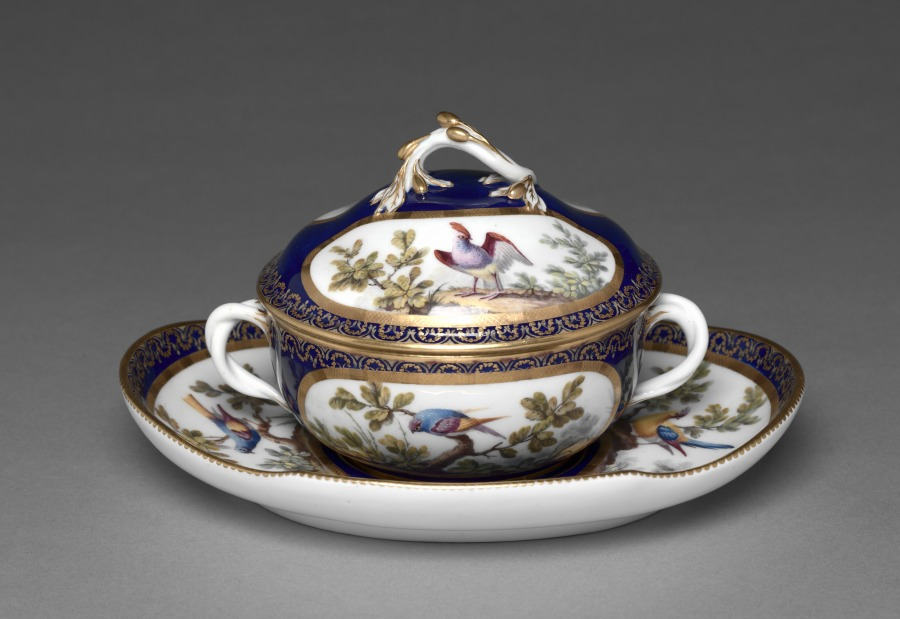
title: Covered Broth Bowl and Stand (Écuelle ronde et plateau ovale)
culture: France, Sèvres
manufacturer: Sèvres Porcelain Factory (French, est. 1756)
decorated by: François-Joseph Aloncle (French)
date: 1772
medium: soft-paste porcelain with enamel and gilt decoration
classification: Ceramic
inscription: Interlaced Ls with date letter 'T'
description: Birds were collected in all forms during the 18th century following an increased European interest in natural history. The birds on this bowl and stand were painted by François-Joseph Aloncle, one of the Sèvres porcelain factory’s principal bird painters. Small, two handled bowls like this one would hold broths or soups consumed by an individual during the toilette, a ritual of washing and dressing practiced by the 18th-century French elite.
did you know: Two different colors of gold decorate these objects’ borders, exemplifying more complex forms of gilding introduced in the 1770s.